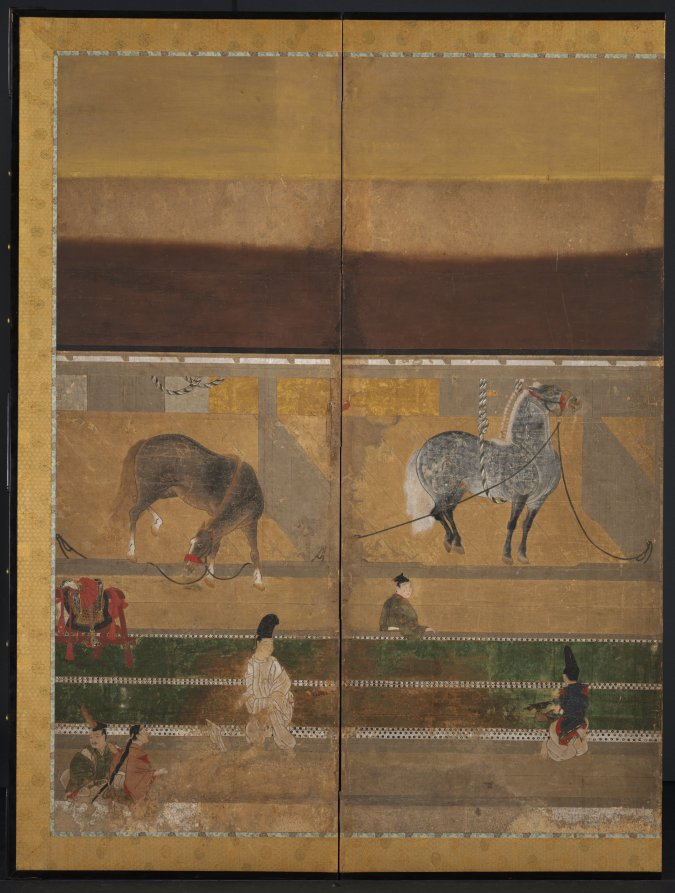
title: Horse Stable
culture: Japan, Muromachi period (1392–1573)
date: early 1500s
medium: One of a pair of six-panel folding screens; ink, color, and gold on paper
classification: Painting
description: Prized horses in stables may be the main theme of the pair of screens of which this screen is a part, but a lot of action is happening on the veranda. Falconry is the focus of this screen, and a lively atmosphere develops in the interplay of the dynamic horses and the birds of prey.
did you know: This is the earliest surviving example of the "horse stable" theme in Japanese screens.